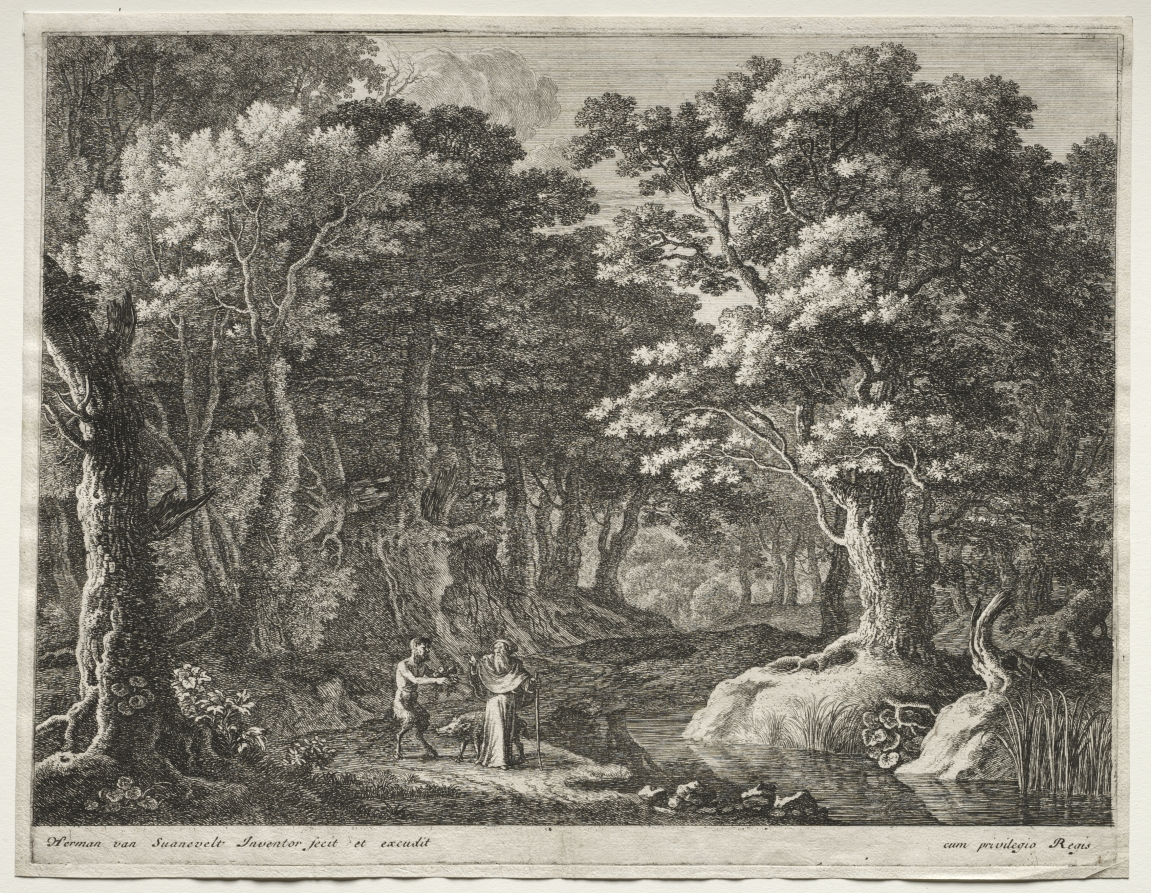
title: The Penitents: The Temptation of St. Anthony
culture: Netherlands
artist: Herman van Swanevelt (Dutch, c. 1600–1655)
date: 1620–55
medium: etching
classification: Print